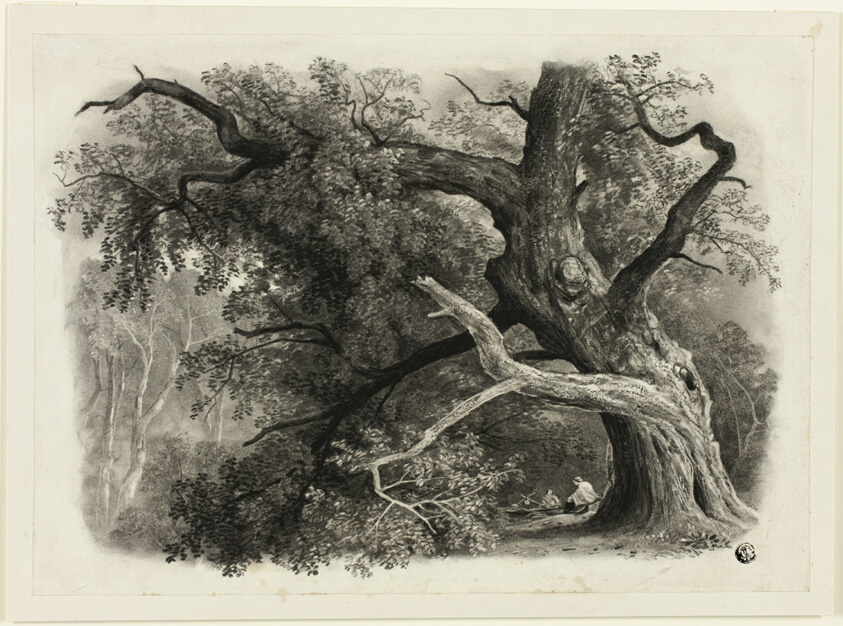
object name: Drawing and Watercolor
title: Old Tree in the Billah - Sherwood Forest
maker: John Rawson Walker (English, 1796-1873)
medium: Charcoal with erasing on ivory wove paper, laid down on ivory boards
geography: England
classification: charcoal; drawings (visual works); prints and drawing